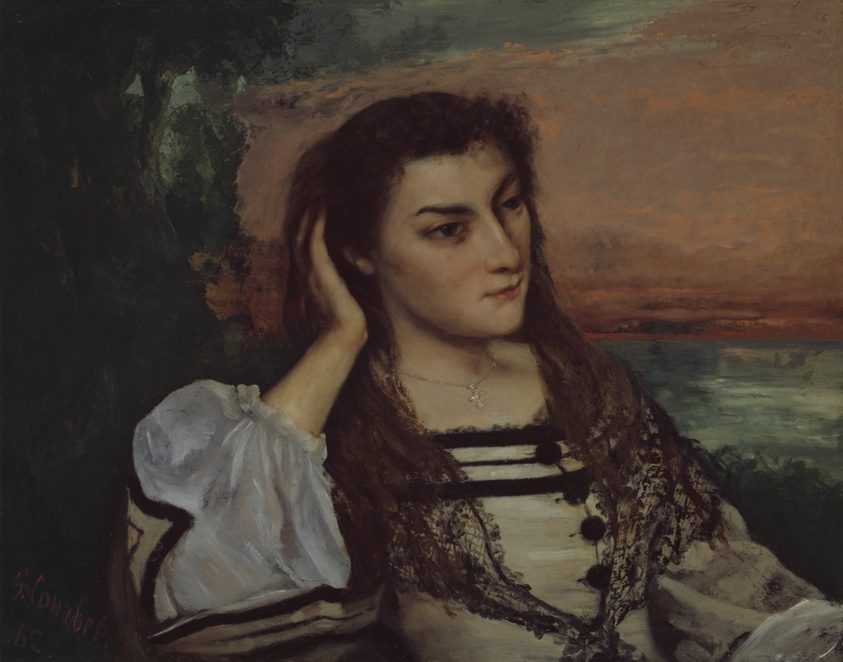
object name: Painting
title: Rêverie (Portrait of Gabrielle Borreau)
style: 19th century, Realism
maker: Gustave Courbet (French, 1819–1877)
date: 1862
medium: Oil on paper, mounted on canvas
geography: France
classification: oil on canvas; french; oil paintings (visual works); paint; portrait; painting; european painting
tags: portraits: female subject, sun, black (color), white (color), necklace, jewelry, dresses, lace, water, landscape, woman, portraits: European subject, portraits, portrait